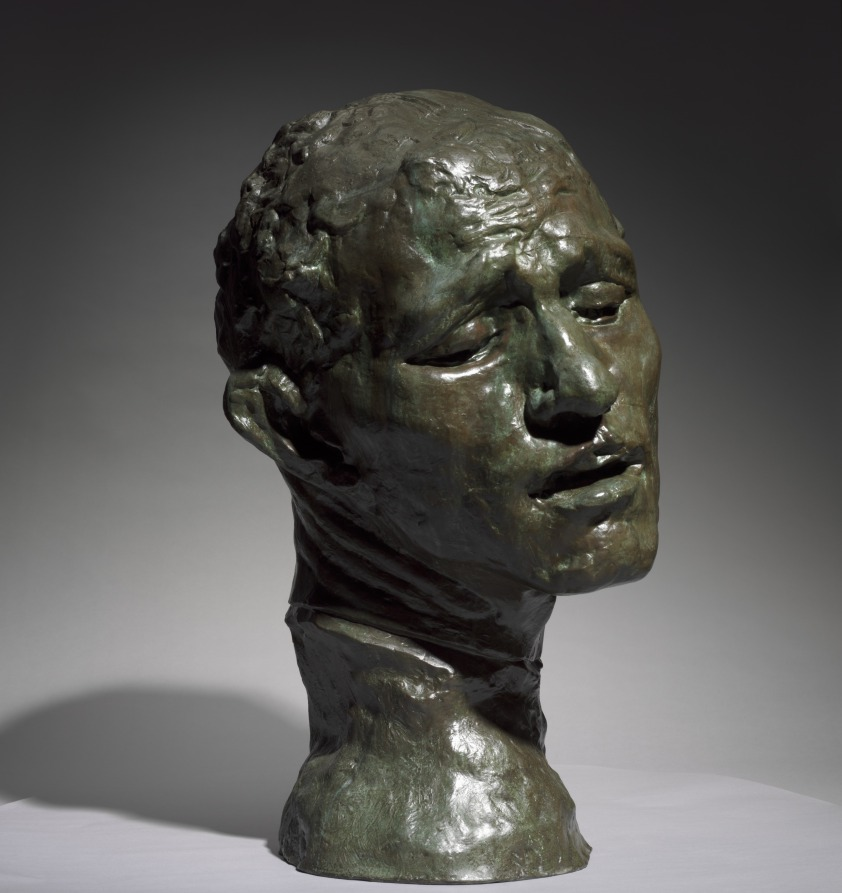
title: Heroic Head of Pierre de Wissant, One of the Burghers of Calais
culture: France, 19th century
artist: Auguste Rodin (French, 1840–1917)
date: 1886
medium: bronze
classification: Sculpture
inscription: inscribed at neck, left: A.Rodin; inscribed lower back: Alexis Rudier/Fondeur-Paris.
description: This sculpture depicts one of the figures in Rodin’s large public monument The Burghers of Calais (1884–89), featuring six French men who volunteered to be taken prisoner by the English in exchange for lifting the siege of Calais during the Hundred Years War (1337–1453). Pierre de Wissant’s anguished expression suggests extreme mental suffering as he contemplates his expected execution. Rodin exhibited a life-size version of the figure as an independent work before completing the monument. He later made multiple versions in various sizes and media.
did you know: This sculpture depicts the head of a figure from Rodin's large public monument The Burghers of Calais (1884-89). The CMA also owns a plaster version of the head.